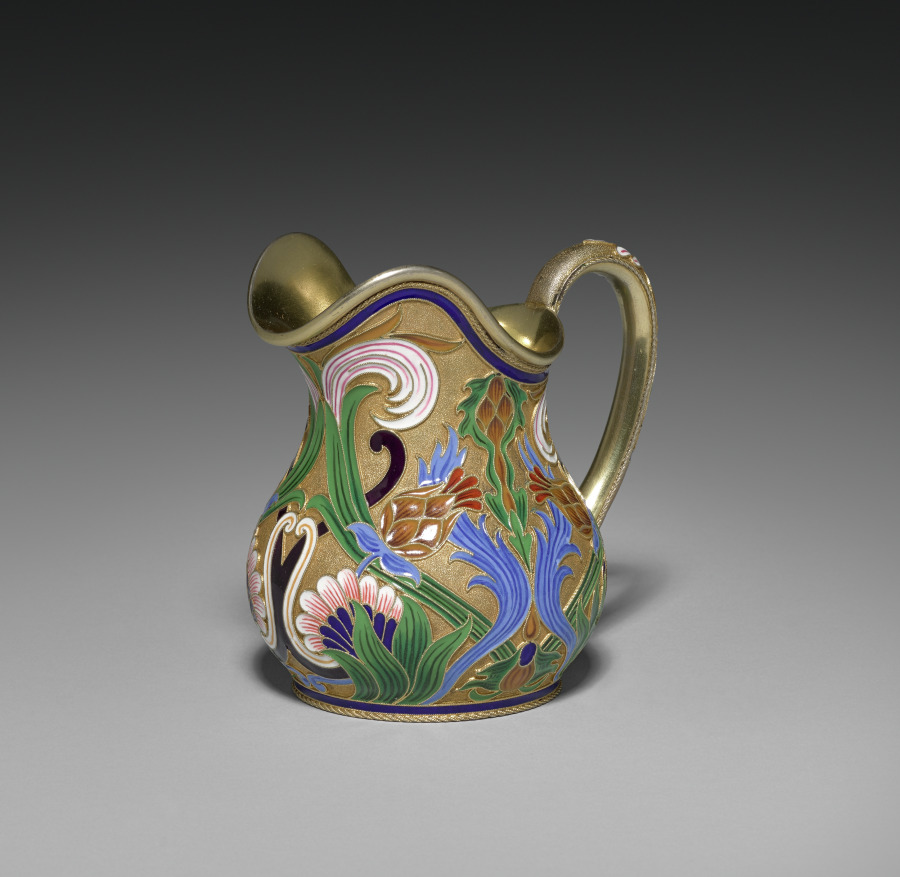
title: Creamer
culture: Russia, St. Petersburg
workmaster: attributed to Feodor Ivanovich Rückert (Russian, 1840–1917)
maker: House of Fabergé (Russian, 1842–1918)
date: 1887–96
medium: silver gilt, opaque cloisonné enamel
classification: Miscellaneous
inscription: 88, St. George [assay mark for Moscow, 1882-1896]; C. Fabergé (in Cyrillic); double-headed eagle [imperial warrant]; 10593 scratched.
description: Fabergé’s craftsmen in Moscow, especially under the watchful eye of workmaster Feodor Rückert, became known for their work in the Pan-Slavic or Neo-Russian style, hearkening back to 17th-century motifs of Russian folk art. Often on rather conventional shapes, Rückert and his silversmiths created an explosion of color, achieved through the historic technique of cloisonné enamel in which tiny metal lines are soldered to the surface then filled with glass powders in various colors and fired to create a high gloss finish. The result is a spectacular evocation of the 17th-century originals. Far from mere copies, however, Rückert's designs, such as this tea service, employ naturalistic or abstract motifs in a thoroughly modern adaptation of a remarkable earlier period of Russian art and decoration.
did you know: This creamer is part of a larger tea service.